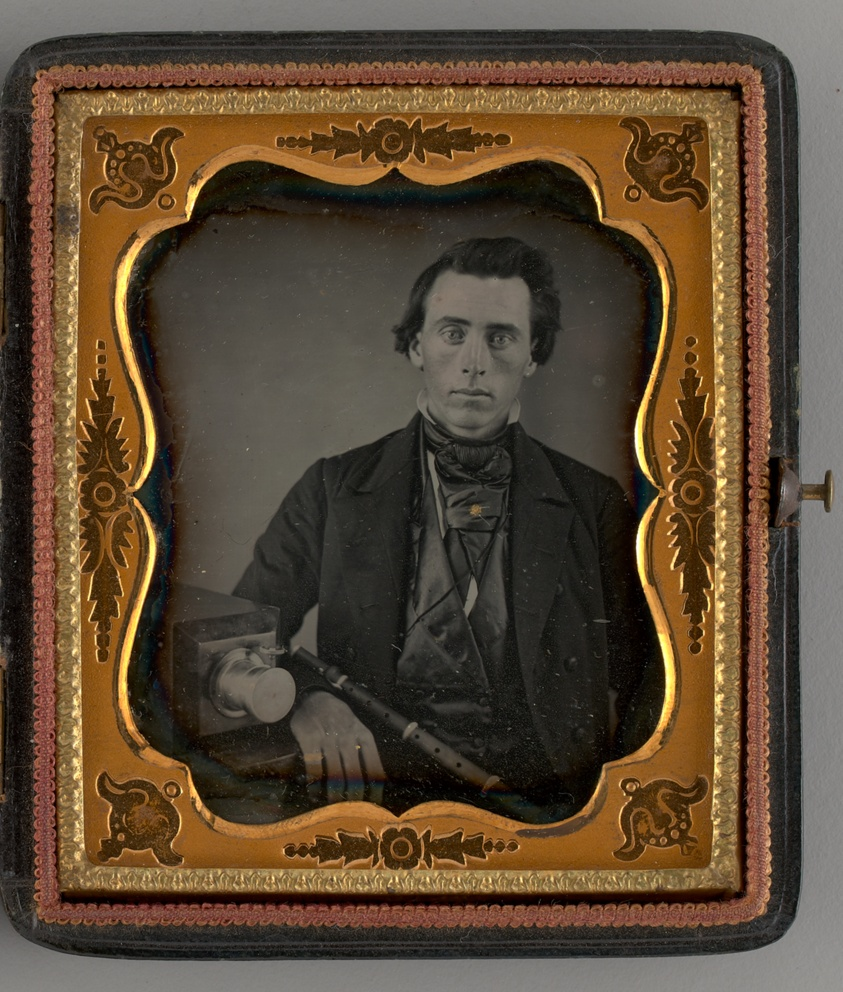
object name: Photograph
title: Untitled (Portrait of a Seated Man with a Camera)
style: 19th century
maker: Unknown maker; American, 19th century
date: 1853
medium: Daguerreotype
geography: United States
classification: portrait; photography; photographic process; photograph; daguerreotype; portrait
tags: lundberg collection, portraits: male subject, portraits, portrait, men, Male, photography